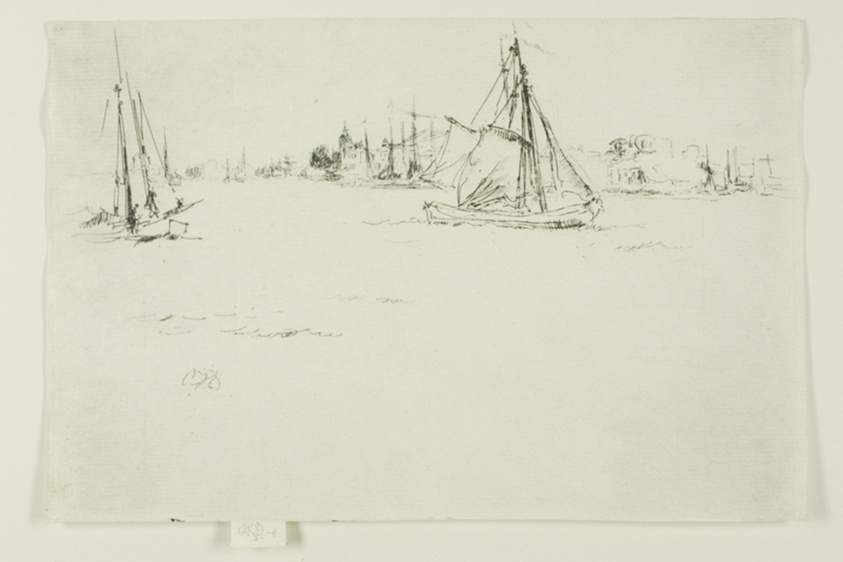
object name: Print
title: Dordrecht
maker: James McNeill Whistler (American, 1834-1903)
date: 1886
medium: Etching with drypoint in black ink on cream laid paper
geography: United States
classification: etching; drypoint; print; prints and drawing; paper